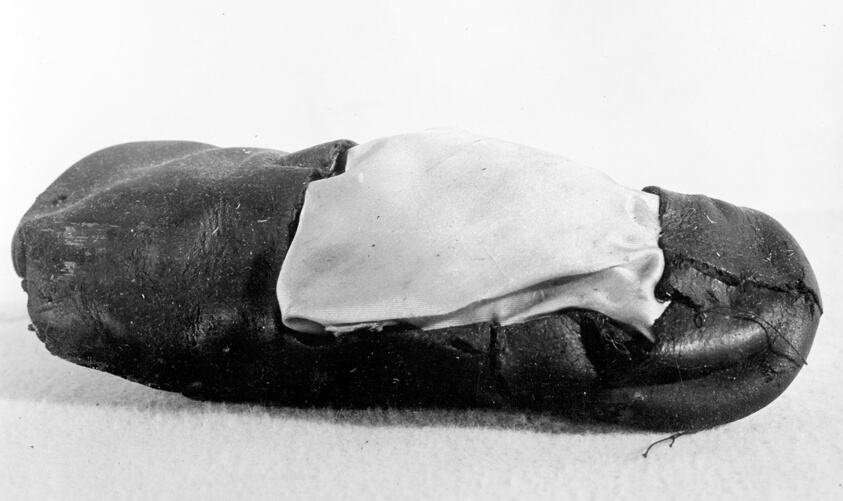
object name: Costume and Accessories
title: Child's Shoe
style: elizabethan, tudor, european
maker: England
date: 16th century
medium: Leather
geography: England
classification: textile; costume accessory - shoe; shoes - misc; costume; dress (garment); clothing